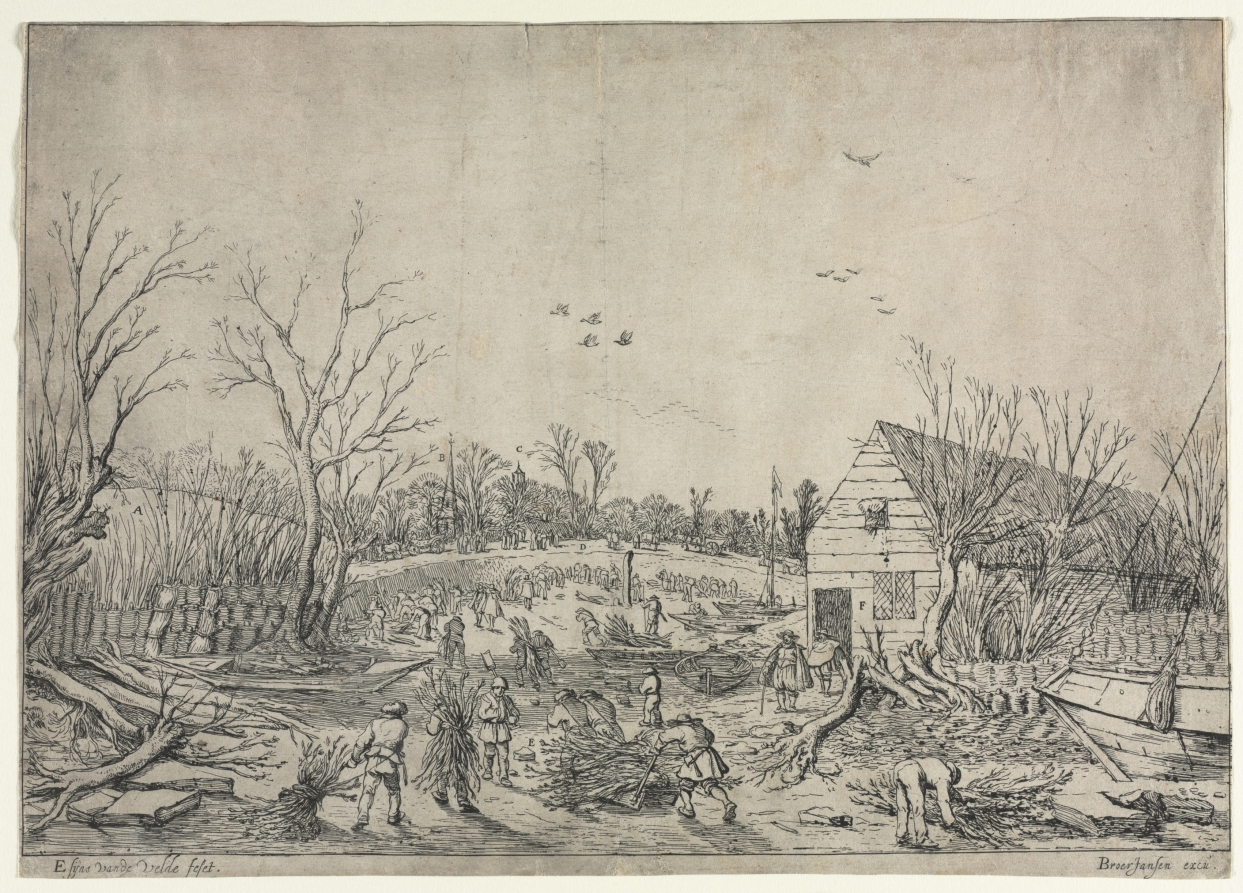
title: The Great Flood of January 10, 1624 (or Repairing the Broken Dike on the River Lek by Vianen, 1624)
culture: Netherlands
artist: Esaias van de Velde (Dutch, 1587–1630)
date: 1624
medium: etching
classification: Print